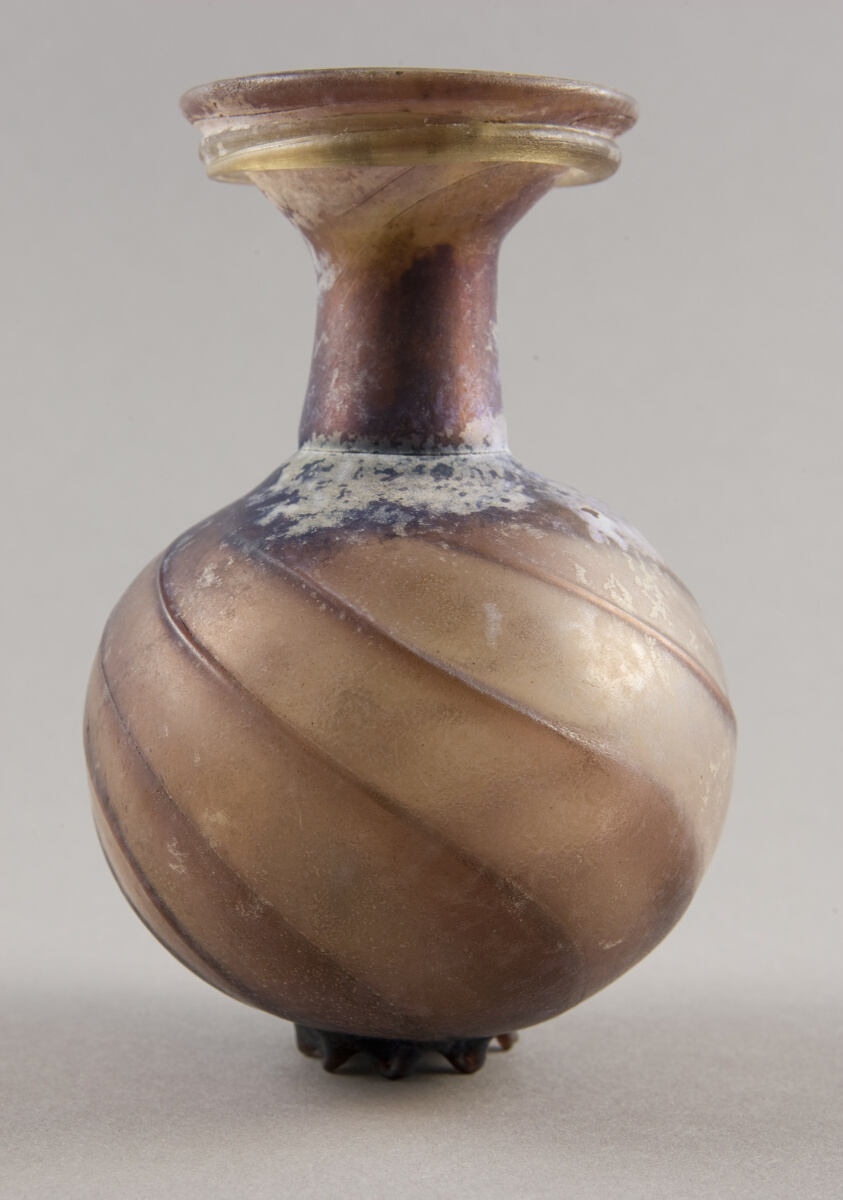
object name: Vessel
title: Jar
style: syrian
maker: Roman; Levant or Syria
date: 2nd-3rd century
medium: Glass, blown technique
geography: Syria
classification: vessel; glass; ancient art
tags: vessels